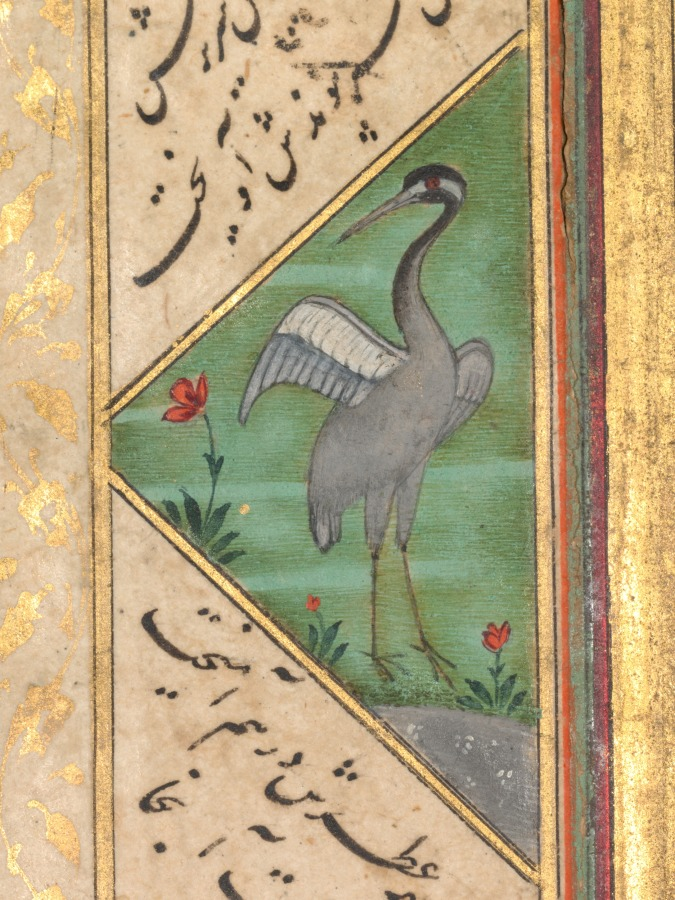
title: Illuminated page (verso), from a Panj Ganj (Five Treasures) of Abd al- Rahman Jami (Persian, 1414–1492) with two Persian masnavis: Yusuf va Zulaykha (Joseph and Zulaykha) and Khirad-nama-i Iskandari (Alexander’s Book of Wisdom)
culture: Western Afghanistan, Herat (text); Mughal India (paintings)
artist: Mushfiq (Indian, active early 1600s)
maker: Sultan 'Ali al-Mashadi (Iranian, 1430–1520)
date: 1603–7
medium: Gum tempera, ink, and gold on paper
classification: Painting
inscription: [[Persian title in gold, nasta’liq script]] Khirad-nama-I Iskandari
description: This section of text from Jami’s poem of Joseph and Zulaykha, written diagonally in the margins, describes the beauties of Zulaykha’s house, in which she intends to seduce Joseph. It includes the following verses: Jeweled lamps on the walls were hung / And odorous herbs were beneath them flung. / She gathered together all things most fair, / And unrolled the carpet of pleasure there. / But amid the charms of the sumptuous hall / She longed only for Joseph, far dearer than all. / A heavenly palace is dark and dim / To a lover whose darling is far from him. The longing of Zulaykha for Joseph metaphorically describes an imperfect devotee’s mystical love for God. With patience, forbearance, and virtuous actions, unification with the divine will eventually occur, even for the most flawed among us. On this page also begins the Khirad-nama-i Iskandari (Alexander’s Book of Wisdom), another of the five narrative poems that make up the Panj Ganj.